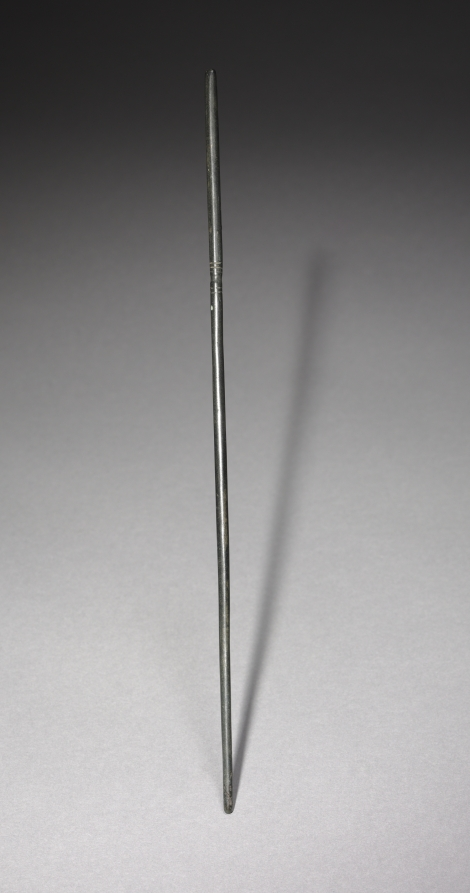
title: Chopstick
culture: Korea, Goryeo dynasty (918–1392)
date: 918–1392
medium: bronze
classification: Metalwork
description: In Korea, chopsticks made of metal such as brass, silver, and gold were excavated from ancient tombs and ruins dated to the 6th century at the earliest. Burial goods often include utilitarian objects such as table wares and utensils because the dead were believed to need them in the afterlife.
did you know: Nowadays Korean still prefer metal chopsticks (stainless steel and brass) to wooden ones.